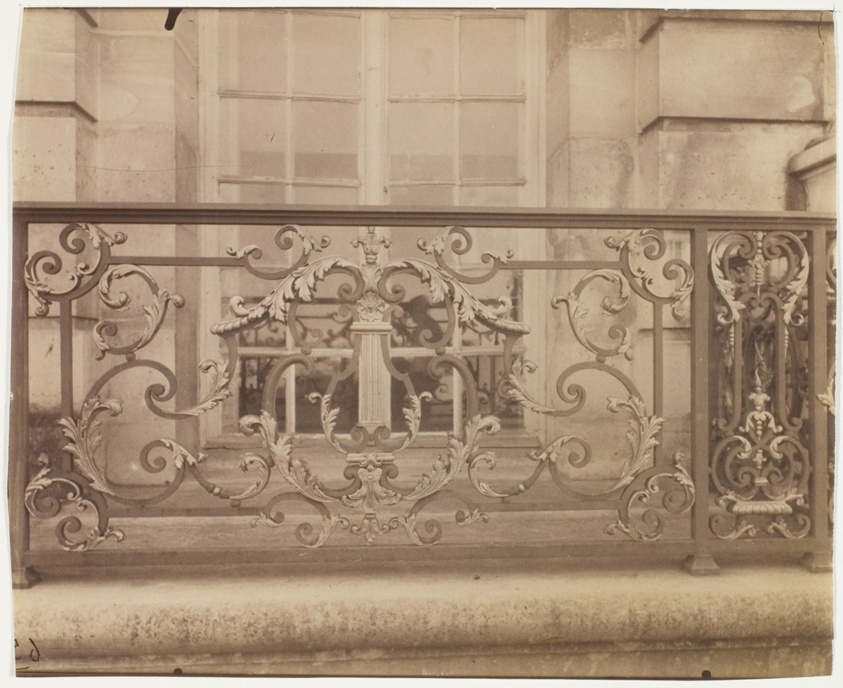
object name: Photograph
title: Versailles, Grille du Chateau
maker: Jean-Eugène-Auguste Atget (French, 1857–1927)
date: 1906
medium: Albumen print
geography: France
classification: albumen silver print; photographic process; photography; photograph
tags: Collected by Hugh Edwards